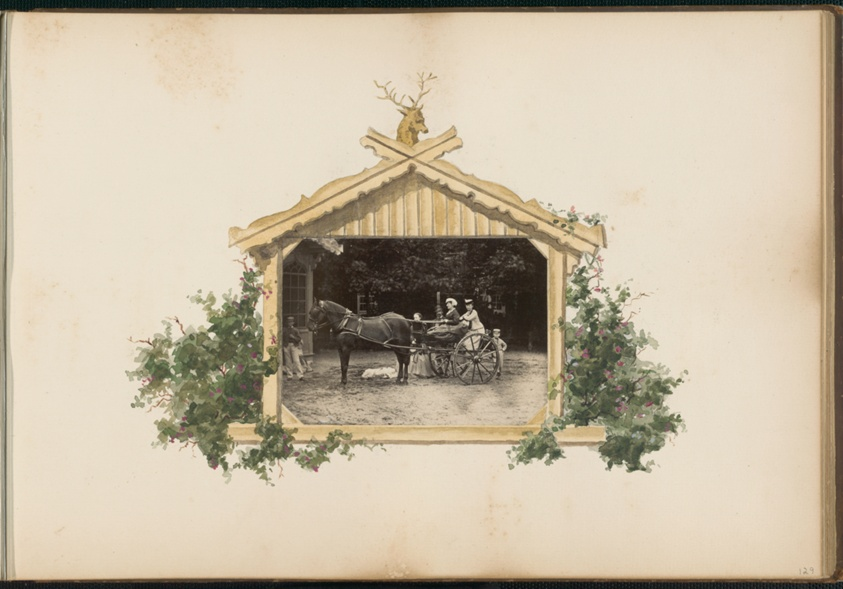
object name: Photograph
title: The Madame B Album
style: 19th century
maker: Marie-Blanche Hennelle Fournier (French, 1831–1906)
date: 1870s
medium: Albumen print with watercolor (in album)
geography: France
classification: photograph; albumen silver print; photography